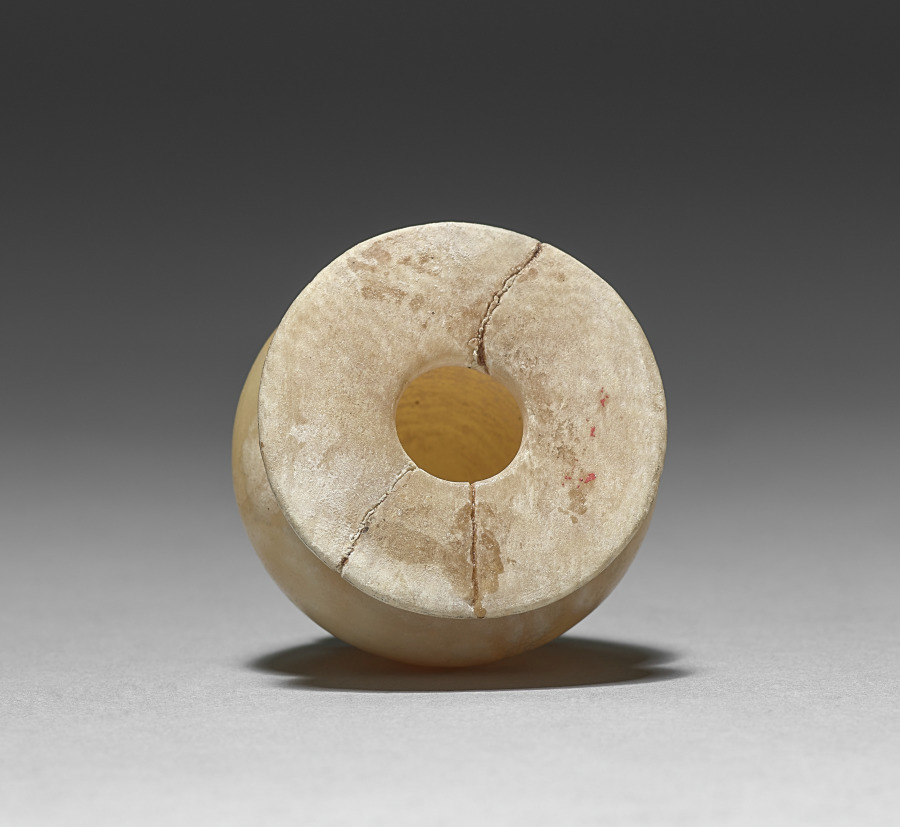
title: Kohl Jar with Lid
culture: Egypt, Middle Kingdom (2040–1648 BCE), Dynasty 12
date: 1980–1801 BCE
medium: travertine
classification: Vessels